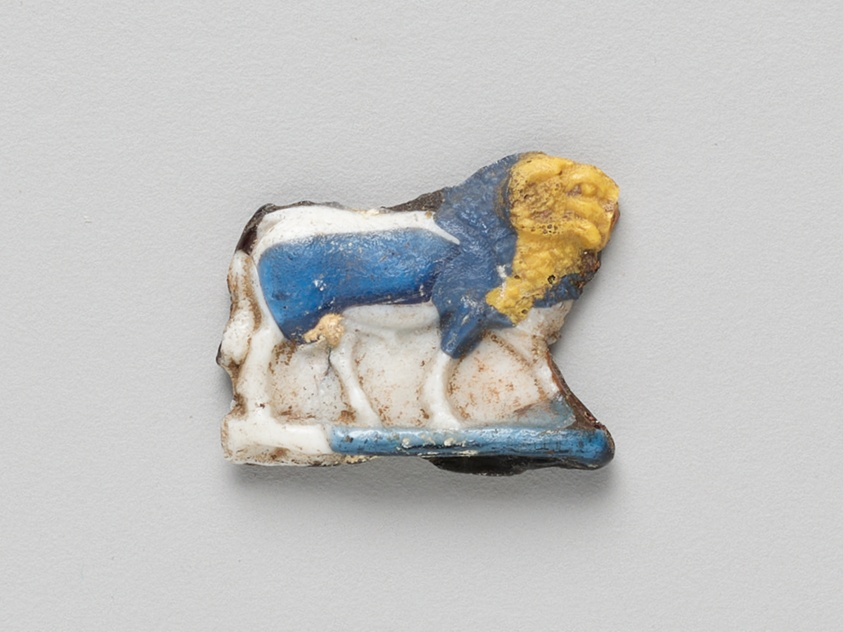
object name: Costume and Accessories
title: Ram Amulet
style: late period (egyptian), egyptian, ancient, ptolemaic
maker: Egyptian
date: Late Period–Ptolemaic Period (664–30 BCE)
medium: Glass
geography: Egypt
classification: amulet; glass; jewelry; ancient art; inlay; costume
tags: animals